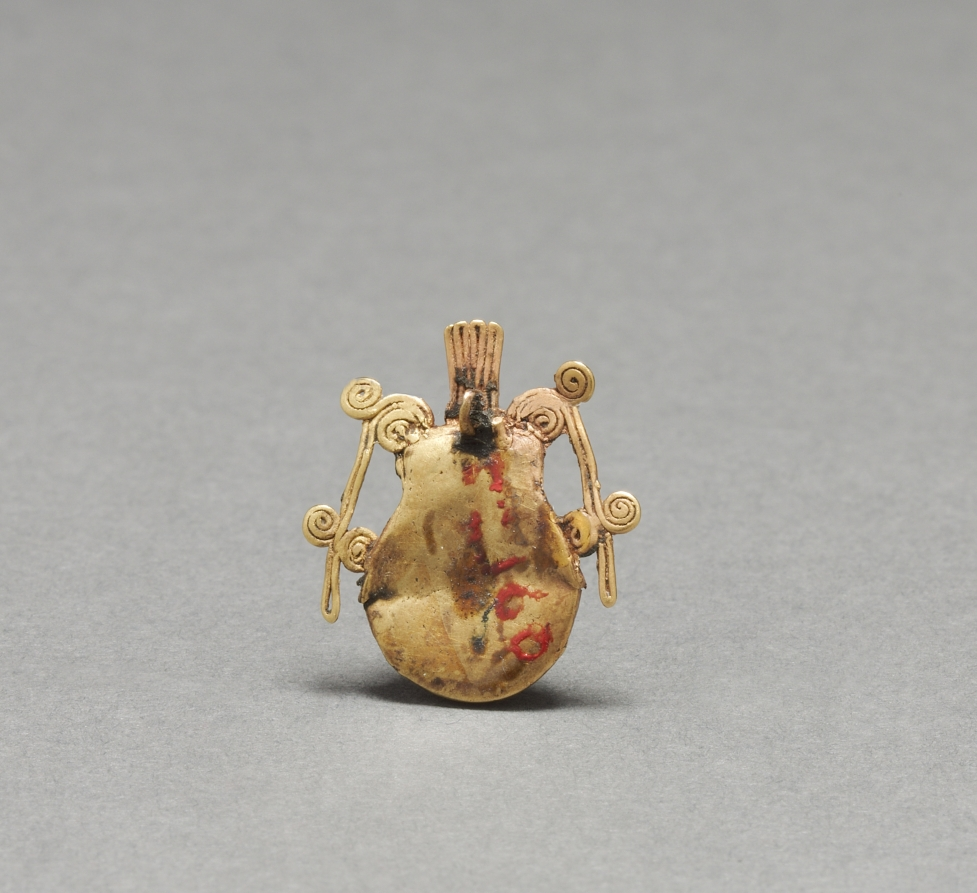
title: Figurine Bell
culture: Mexico, Mixtec, 13th-16th century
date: c. 1200–1519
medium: gold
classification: Jewelry